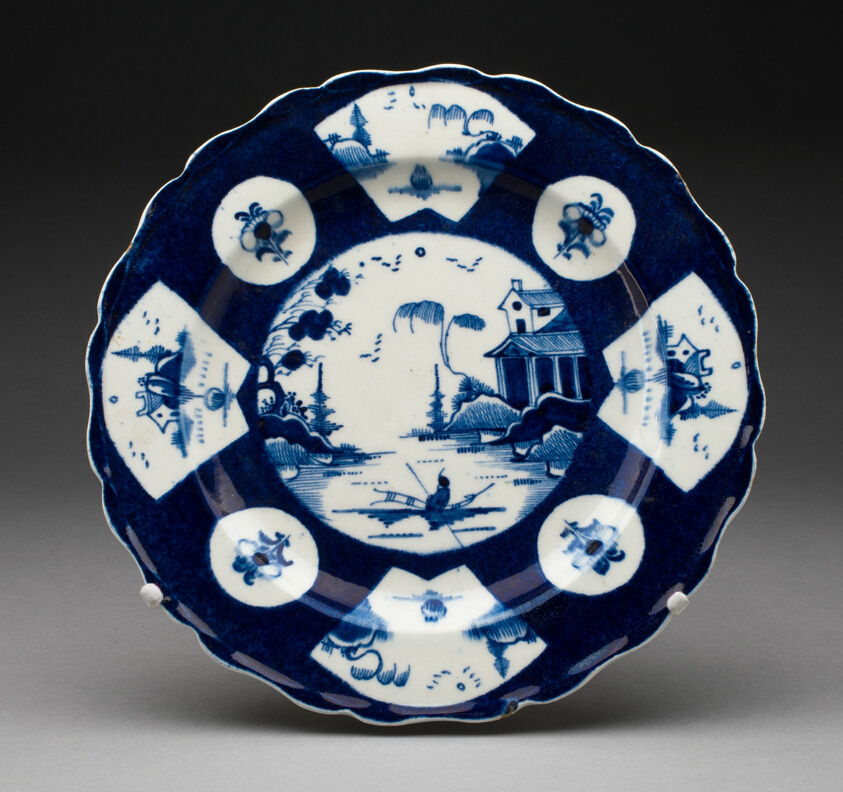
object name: Ceramics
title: Plate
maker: Bow Porcelain Factory (London, England, 1744-1775)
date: 1755/65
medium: Soft-paste porcelain, underglaze blue decoration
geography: Bow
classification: plate (general, dish); dish (vessel); porcelain; european decorative arts; ceramics